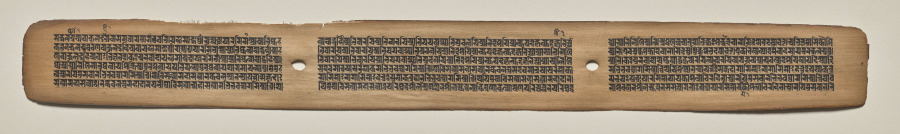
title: Text, Folio 145 (recto), from a Manuscript of the Perfection of Wisdom in Eight Thousand Lines (Ashtasahasrika Prajnaparamita-sutra)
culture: Eastern India, Bihar, Vikramashila Monastery. Painting: Nepal, Kathmandu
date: Sunday, September 14, 1119 (year 239 of the Newar Samvat in the month of Ashvina)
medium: gum tempera and ink on palm leaves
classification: Painting